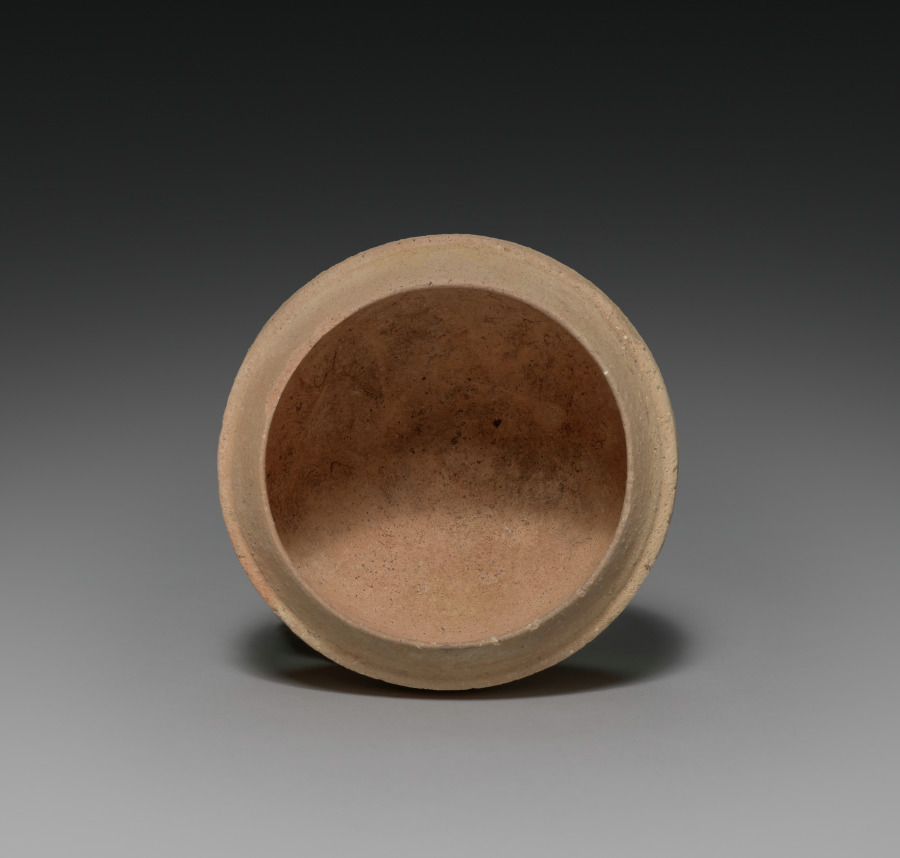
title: Lidded Jar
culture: Korea, Silla (57 BC-935) or Kaya (AD 42-562) period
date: 400s–500s CE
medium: red earthenware with incised band designs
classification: Ceramic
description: Early earthenware from the Three Kingdoms period (57 BCE–668) became widely utilized as agriculture and religion grew to be essential elements in sustaining society and its systems. The clay jars of different sizes and shapes on display were made for the following purposes: some were used to store harvested grains and seeds, some, especially lidded ones such as this, to preserve cremated remains, and some to serve offerings in rituals.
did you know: Closed kilns built on hillsides became widely used for producing this type of pottery vessel in Korea during the Three Kingdoms period.